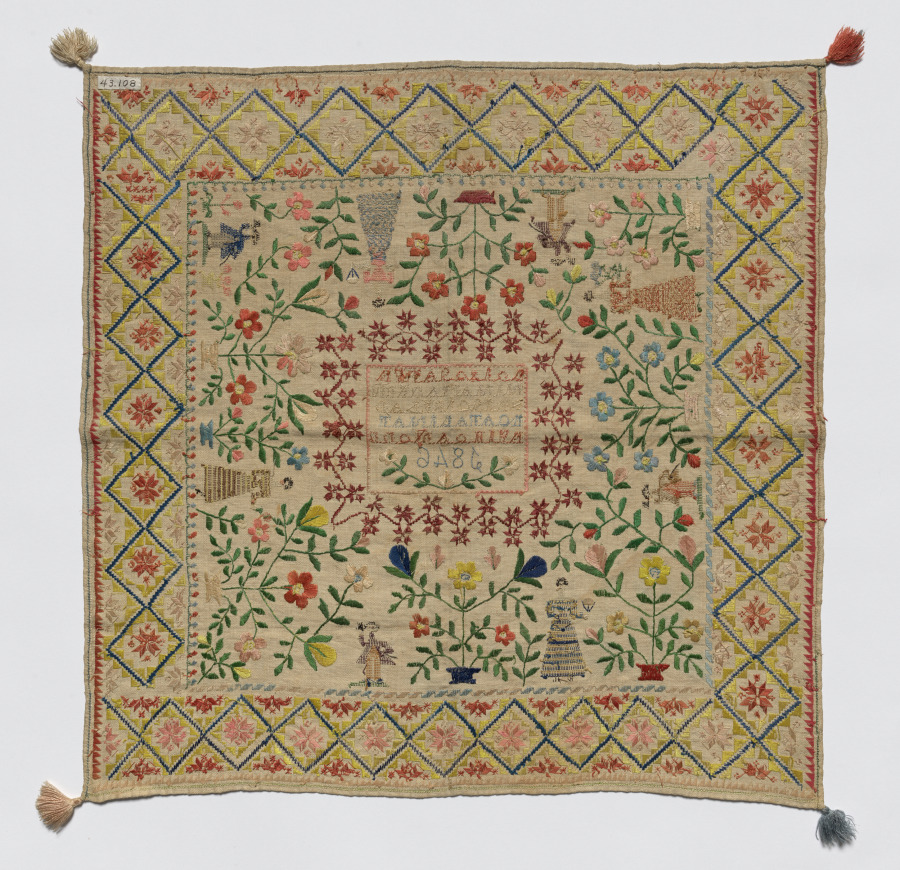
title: Sampler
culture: Spain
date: 1846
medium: embroidery; silk on linen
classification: Sampler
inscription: in square in center: "LO IZO SATVR/NINA MADVEÑ/O DISCIPVLA D/E CATALINA T/RVILLO AÑO DE/ 1846" (Saturnina Madueno made it, pupil of Catalina Tru-[j] illo in the year 1846).